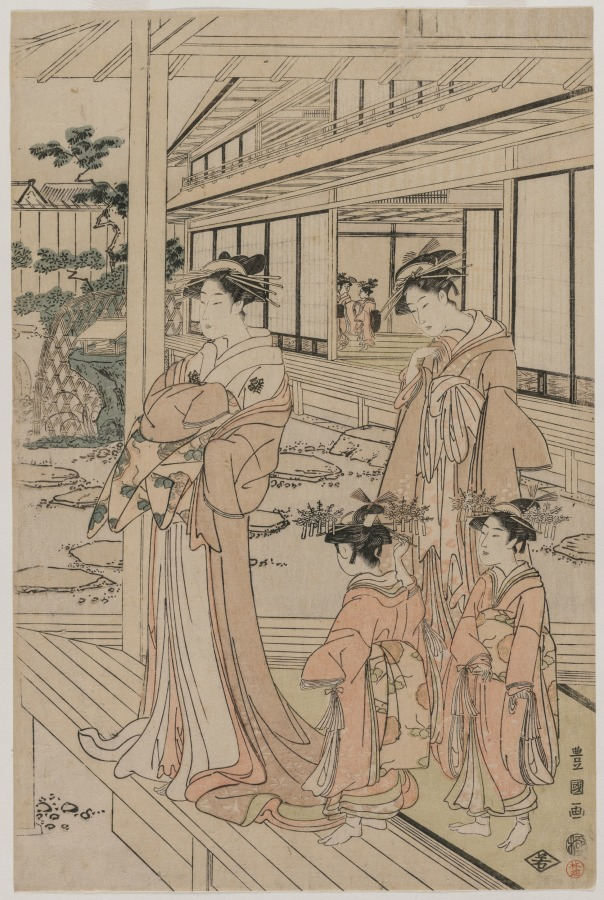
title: Courtesan Standing on a Veranda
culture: Japan, Edo period (1615–1868)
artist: Utagawa Toyokuni (Japanese, 1769–1825)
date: early 1790s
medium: color woodblock print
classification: Print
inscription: Signature: Toyokuni ga Publisher: Wakasaya Yoichi (Waka) Censorship Seal: kiwame